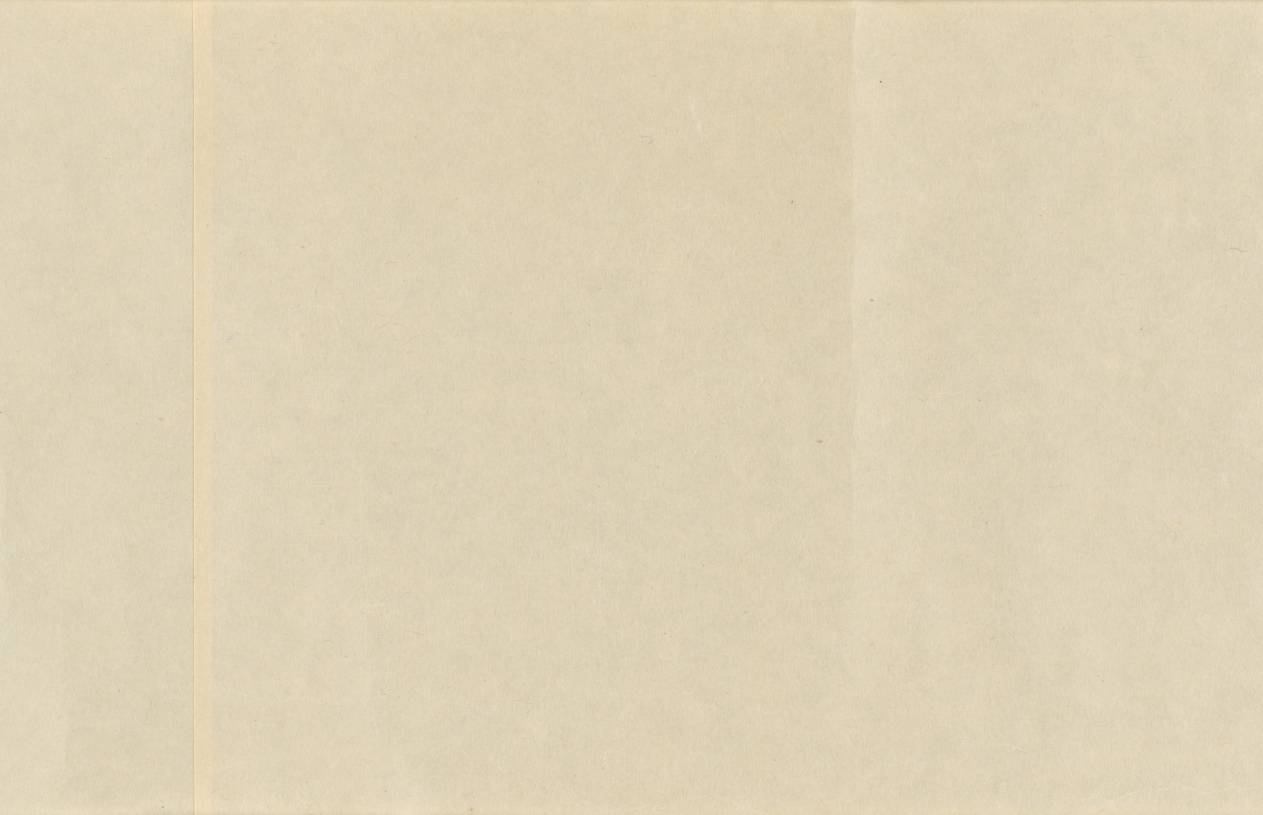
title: Eight Views of Xiao-Xiang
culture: Japan, Muromachi period (1392–1573)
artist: Sesson Shūkei (Japanese, c. 1492–c. 1577)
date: 1500s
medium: handscroll; ink on paper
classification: Painting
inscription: Signature and seal of artist at end of painting.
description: Eight Views of the Xiao and Xiang Rivers can be traced to 11th-century Chinese poems and paintings, the depiction of which had also become popular among Korean and Japanese painters. Xiao-Xiang refers to the region in present-day Hunan province where the Xiao and Xiang rivers converge. Few painters of the Eight Views had in fact seen the scenery; rather, they were trying to portray in ink and wash the lyrical qualities of dim light and a misty atmosphere typical of that region. Each of the poetic titles suggests a time of day, a season, or specific atmospheric conditions—subjects that challenged the abilities of the most talented artists. In this miniature painting (shukuzu) of the Muromachi period, Japanese Zen monk and painter Shukei Sesson depicted all eight views featured in Chinese prototypes: Wild Geese Descending to Sandbar; Returning Sails Off a Distant Coast; Mountain Market in Clearing Mist; River and Sky in Evening Snow; Autumn Moon over Dongting Lake; Night Rain on the Xiao and Xiang; Evening Bell from Mist-Shrouded Temple; and Fishing Village in Evening Glow.